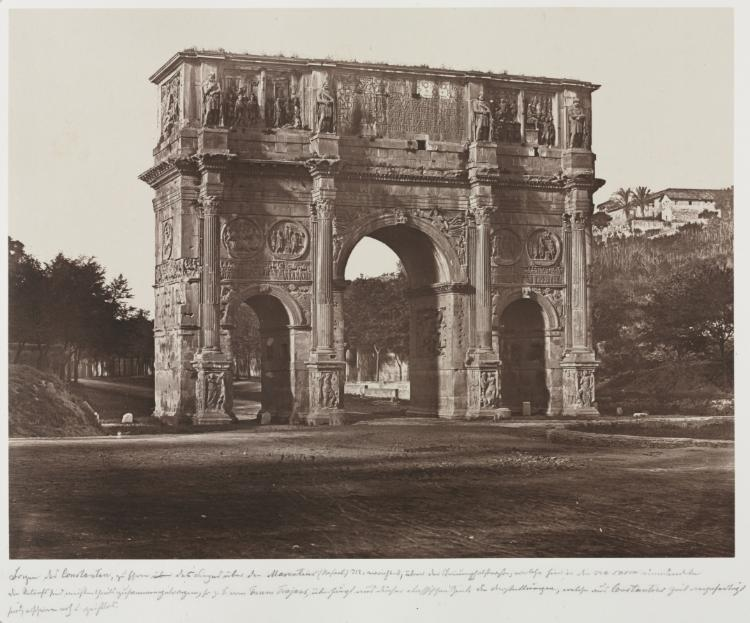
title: Arch of Constantine, Rome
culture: England, 19th century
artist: James Anderson (British, 1813–1877)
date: c. 1858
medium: albumen print from wet collodion negative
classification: Photograph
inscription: Written in pencil on recto: "Bogen des Constantin, zu Ehren des Sieges über den Maxentius (Rafael [?]) 312 erichtet, über der Triumphalstrasse, welche heir in die Via Sacra einmündete. Die Reliefs sind meistentheils zusammengetragen, so z. B. [zum Beispiel] vom Forum Trafans, überhaupt aus dieser classischen Zeit. Die Darstellungen, welche aus Constantins Zeit angefertigt sind, erscheinen roh und geistlos."